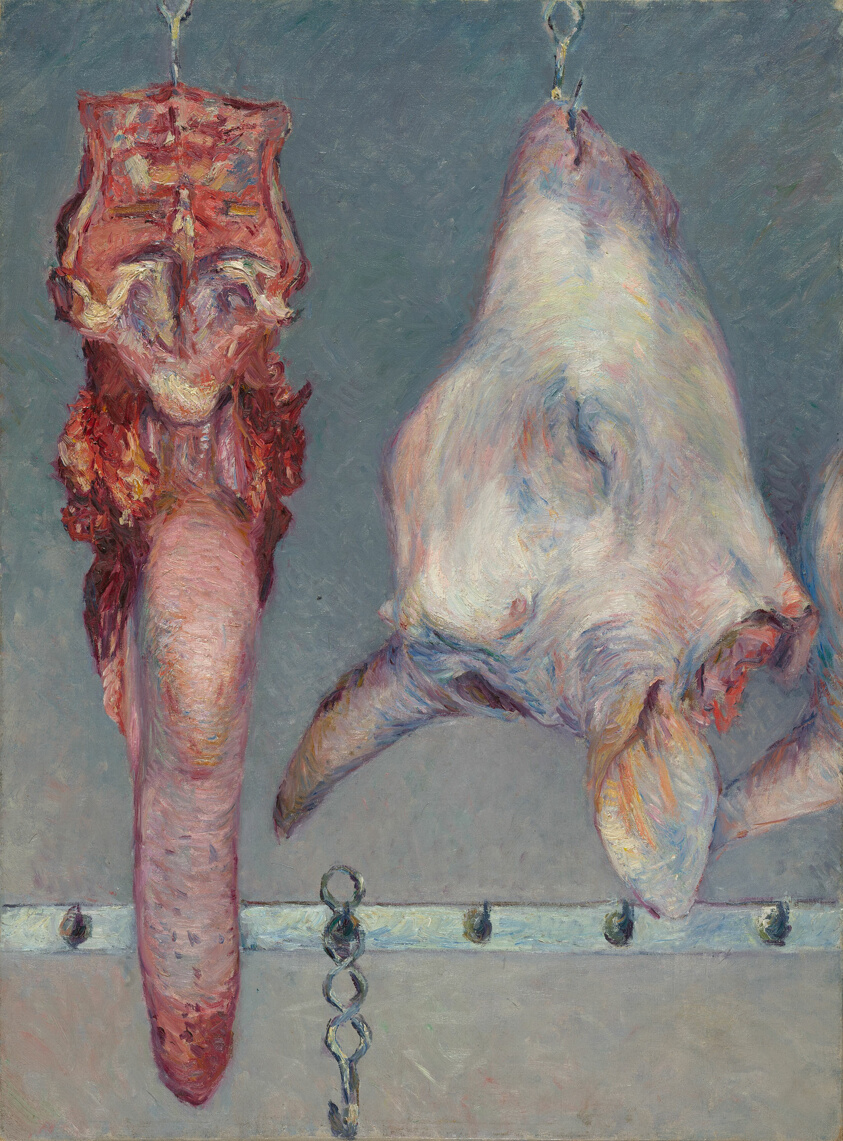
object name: Painting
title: Calf's Head and Ox Tongue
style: Impressionism, 19th century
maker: Gustave Caillebotte (French, 1848–1894)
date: c. 1882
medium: Oil on canvas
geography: France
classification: oil on canvas; oil paintings (visual works); paint; french; painting; european painting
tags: still life, animals, calfs, death, food, Market, oxen, portraits, circles